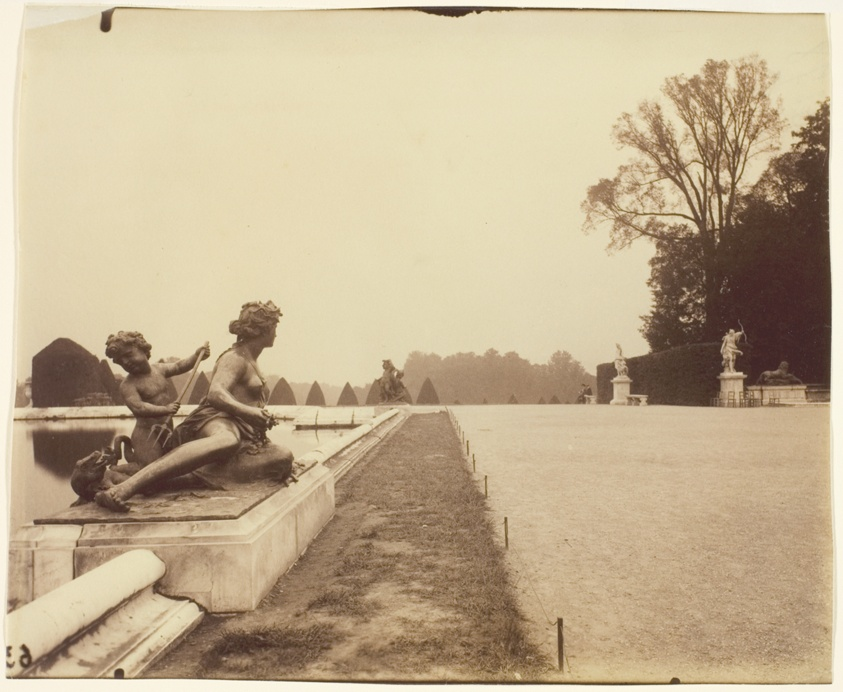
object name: Photograph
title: Versailles, Coin de Parc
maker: Jean-Eugène-Auguste Atget (French, 1857–1927)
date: 1902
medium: Albumen print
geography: France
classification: albumen silver print; photographic process; photography; photograph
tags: Collected by Hugh Edwards